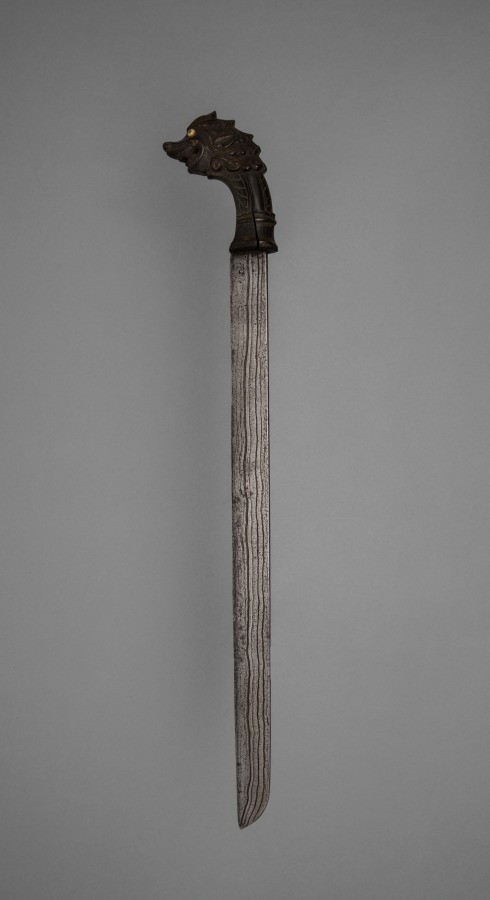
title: Sword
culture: Indonesia, Sulawesi (Celebes)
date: before 1918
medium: metal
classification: Arms and Armor